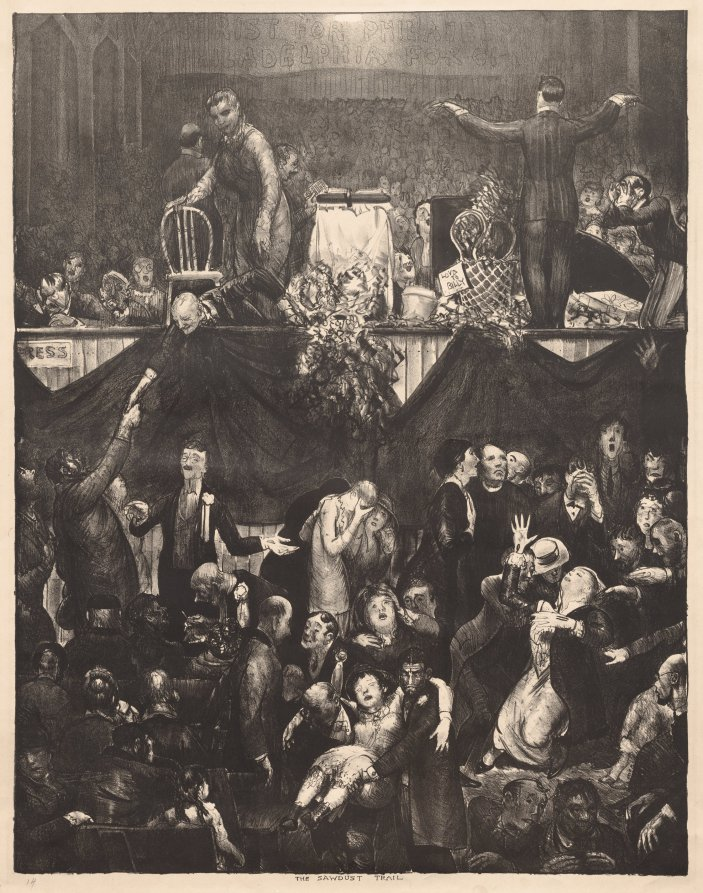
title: The Sawdust Trail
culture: America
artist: George Bellows (American, 1882–1925)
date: 1917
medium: lithograph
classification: Print